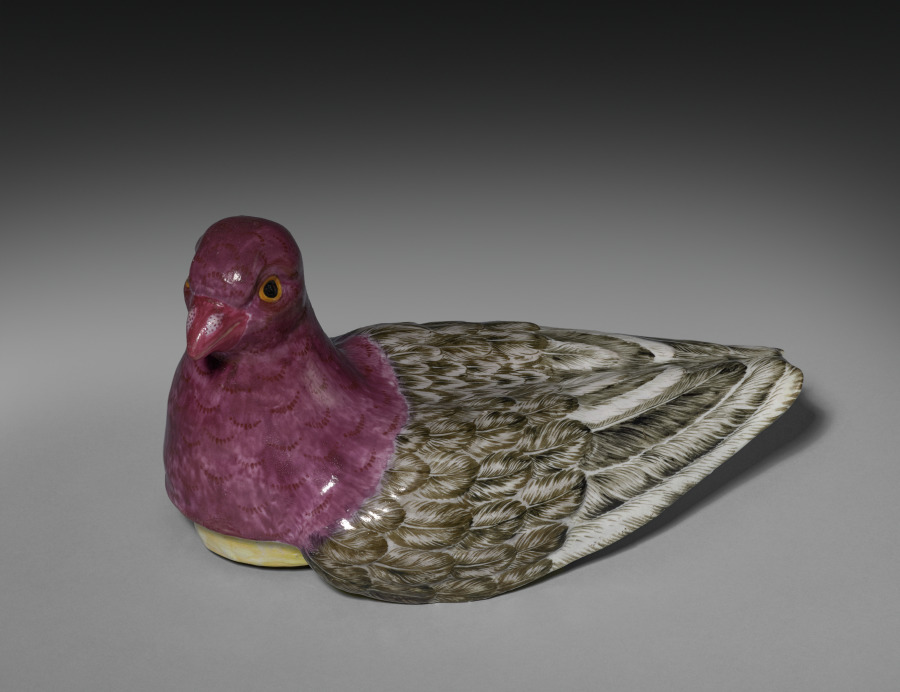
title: Cover for a Tureen in the Form of a Pigeon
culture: France, 18th century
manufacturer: Sceaux Factory (French, active 1748–66)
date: c. 1760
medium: Tin- glazed earthenware (faience) wth enamel decoration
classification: Ceramic